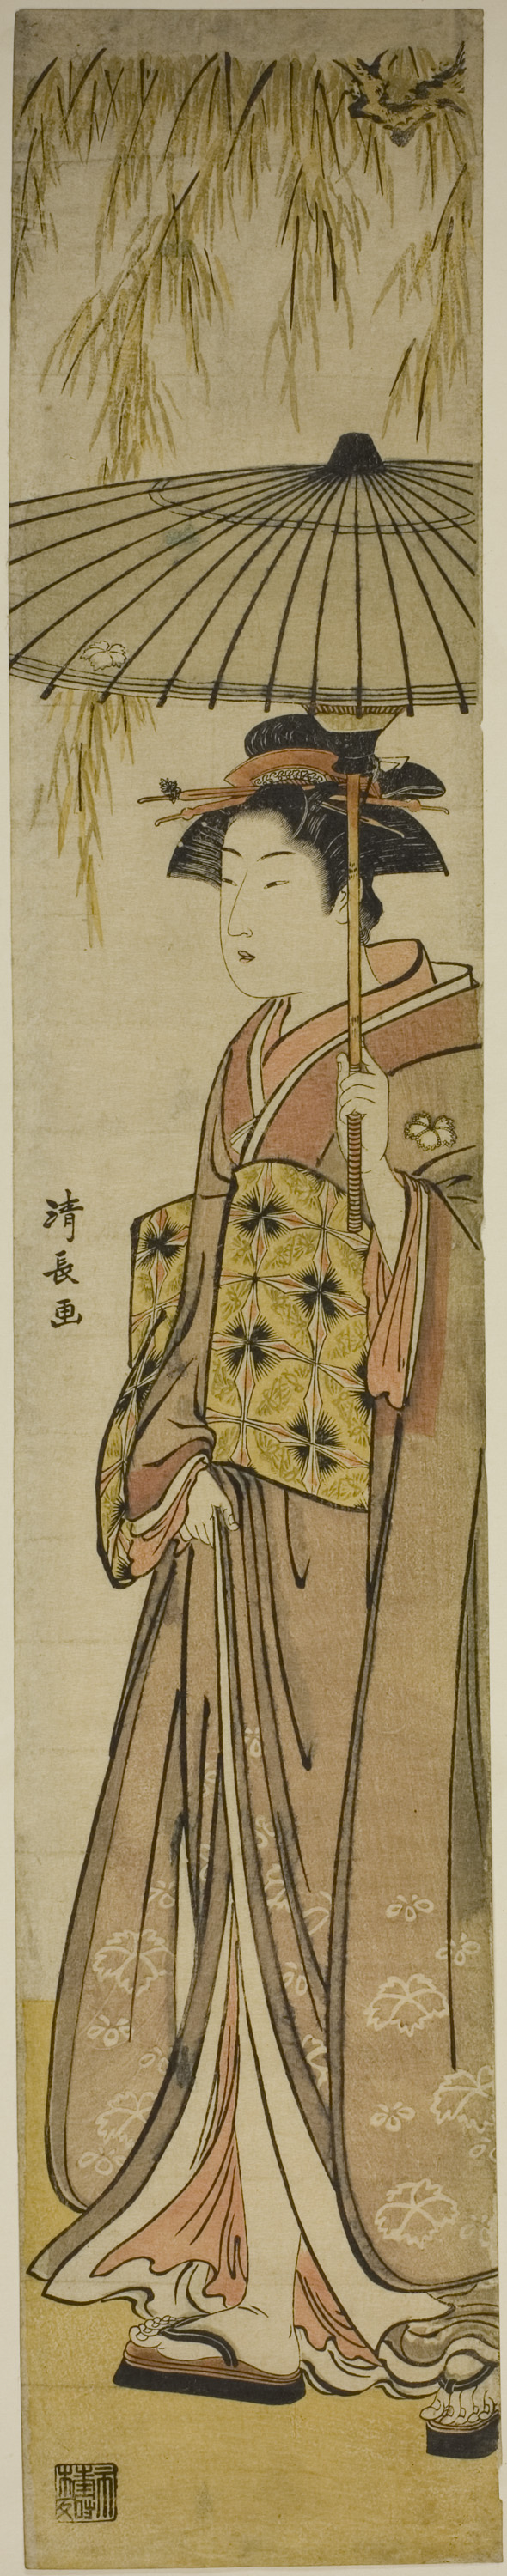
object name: Print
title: Geisha Carrying a Parasol under a Willow Tree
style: Japanese (culture or style)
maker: Torii Kiyonaga (Japanese, 1752-1815)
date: c. 1784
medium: Color woodblock print; hashira-e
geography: Japan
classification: woodblock print; print; asian art